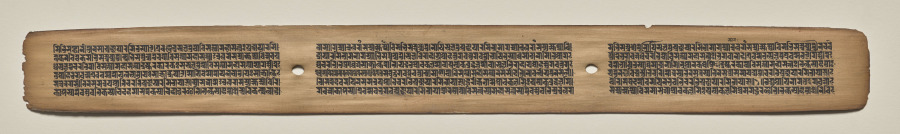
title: Text, folio 155 (recto), from a Manuscript of the Perfection of Wisdom in Eight Thousand Lines (Ashtasahasrika Prajnaparamita-sutra)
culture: Eastern India, Bihar, Vikramashila Monastery. Painting: Nepal, Kathmandu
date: Sunday, September 14, 1119 (year 239 of the Newar Samvat in the month of Ashvina)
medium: gum tempera and ink on palm leaves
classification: Painting